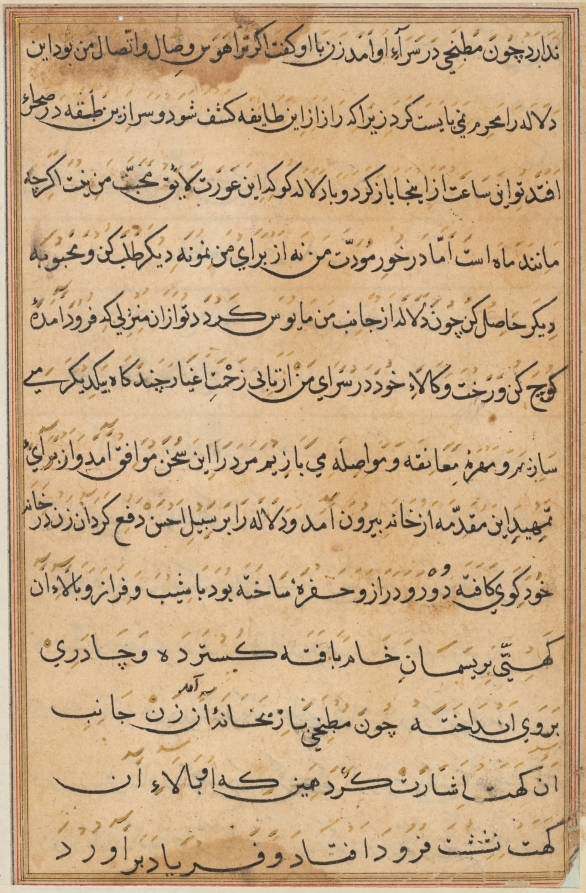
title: Page from Tales of a Parrot (Tuti-nama): text page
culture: Mughal India, court of Akbar (reigned 1556–1605)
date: c. 1560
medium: gum tempera, ink, and gold on paper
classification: Painting